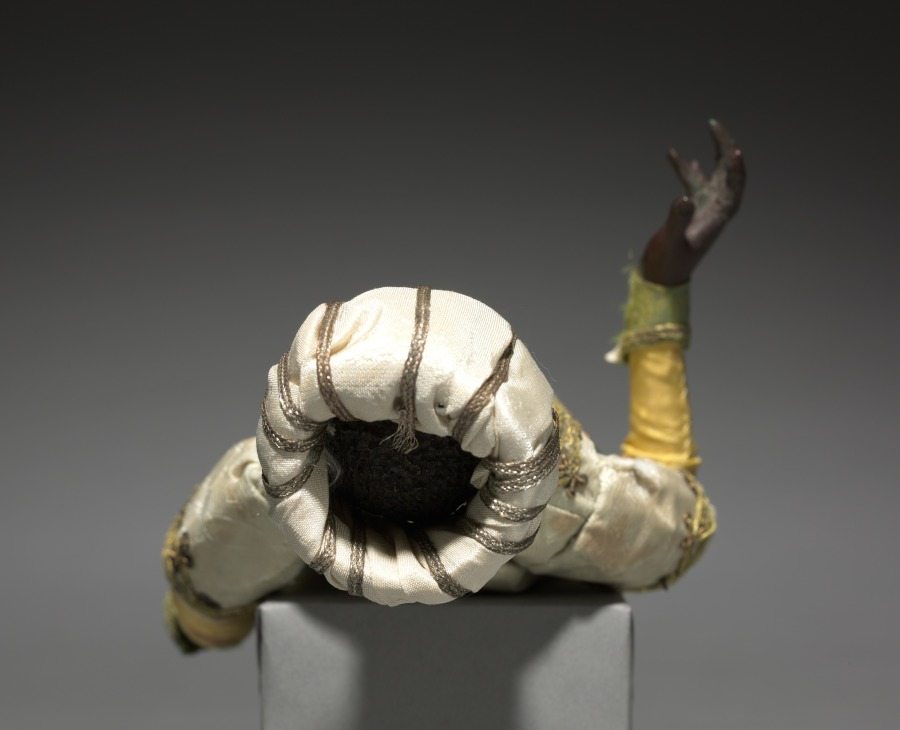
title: Figure from a Crèche: Attendant of the Magi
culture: Italy, Naples, late 18th-early 19th century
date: 1780–1830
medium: painted wood and terracotta with various textiles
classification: Sculpture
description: The practice of creating scenes of the Nativity for the home dates from the early 1700s in Italy, where people began to set up doll-like figures of about a foot or less in height. The custom was particularly popular in Naples around 1800, where crèche scenes (crèche means cradle, or crib) included many figures, whose heads and hands of painted terracotta, stuffed cloth bodies, and clothing adapted from contemporary local costumes gave them an amazingly realistic character. Representations of the birth of Jesus can be traced to the first few centuries of Christianity. Both living creatures and sculptural depictions of them were used from early times. By the late middle ages it was customary to create life-size figures of wood or stone, naturalistically painted, to represent the characters who participated in the events of Jesus's early life. These sculptures were then arranged in scenes illustrating one or both of the most important of these events, the Adoration of the Shepherds and the Adoration of the Magi-the three kings from the East who came to pay homage to the Christ child. Used in churches, these large figures were especially popular in Italy, Central Europe, Spain, and Portugal.